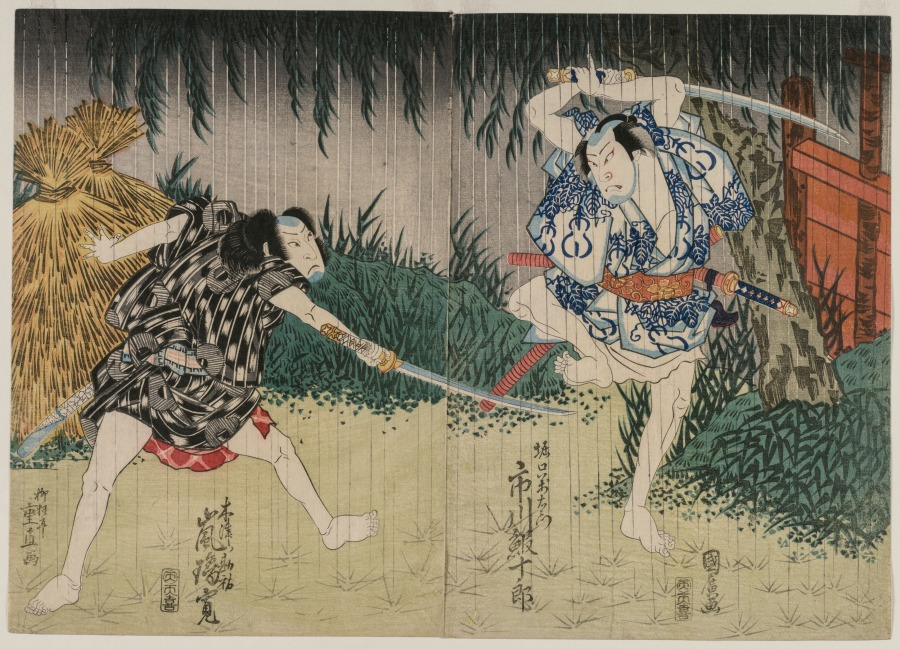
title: Arashi Rikan II as Kizu Kansuke; Ichikawa Ebijuro II as Horiguchi Manzaemon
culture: Japan, Edo period (1615–1868)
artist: Shigenao (Japanese)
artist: Utagawa Kunihiro (Japanese)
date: 1829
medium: color woodblock print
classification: Print